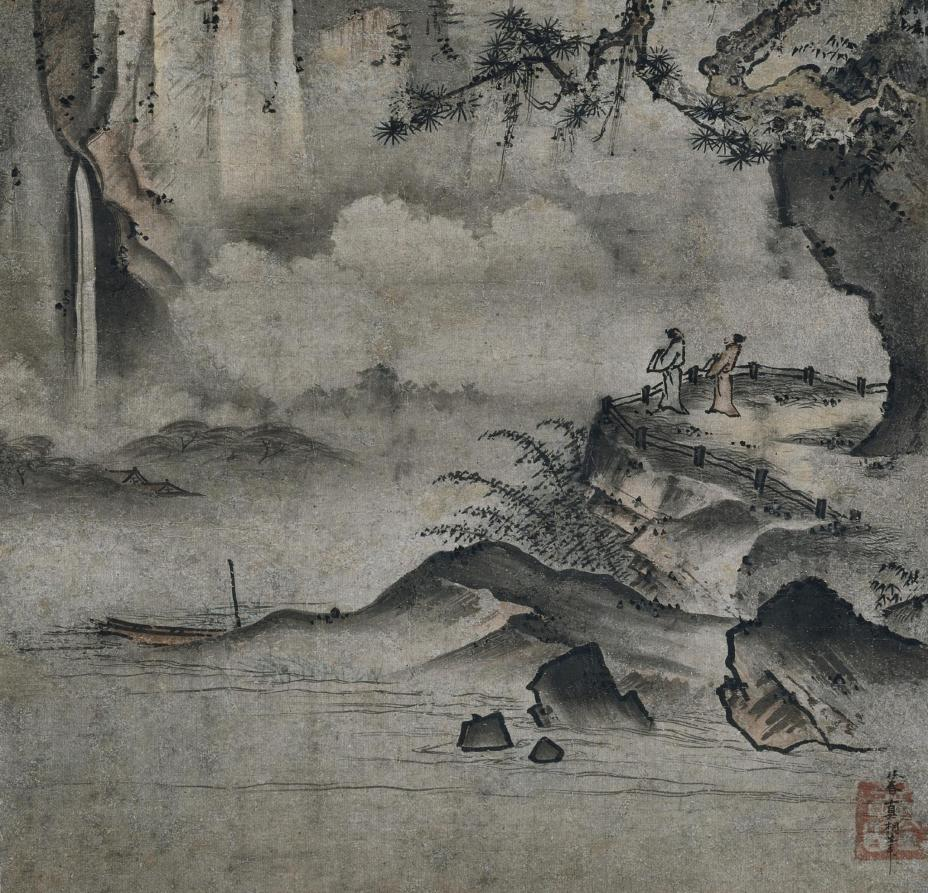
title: Gazing at a Waterfall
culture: Japan, Muromachi period (1392–1573)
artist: Sōami (Japanese, d. 1525)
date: early 1500s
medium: Album leaf mounted as a hanging scroll; ink and slight color on paper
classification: Painting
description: Chinese poet Li Bai’s (701–762) poem “Gazing at a Waterfall on Mount Lu” is about experiencing the vastness of the galaxy in relationship to one’s own being. Japanese Zen monk-poet Keijo Shūrin (1440–1518) identified Li’s poem as the inspiration for Japanese painter Geiami’s (1431–1485) work Gazing at a Waterfall, in the collection of the Nezu Museum, which features sharp brushstrokes and bright colors. In contrast, this album leaf’s painter, Geiami’s son Sōami, took a more delicate approach to the theme. The waterfall and the pair watching it frame the mist rising from the water at the center of the image.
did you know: The setting of this painting is historical China, as evidenced by the clothing and hairstyles of the two people appreciating the waterfall.